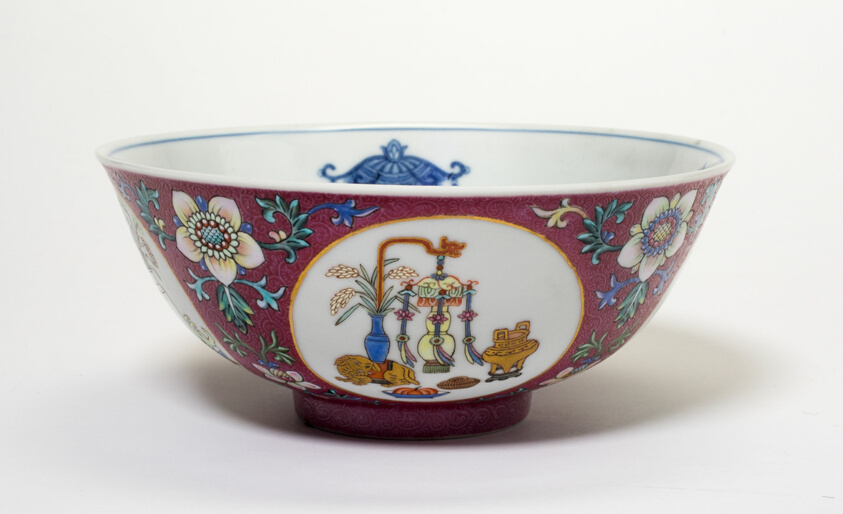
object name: Vessel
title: Bowl with Medallions of Archaistic and Auspicious Motifs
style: Chinese (culture or style)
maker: China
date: Qing dynasty (1644–1911), Daoquang reign mark and period (1821–1850)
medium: Porcelain painted in underglaze blue and overglaze enamels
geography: China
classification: bowl; porcelain; dish (vessel); asian art; ceramics; vessel